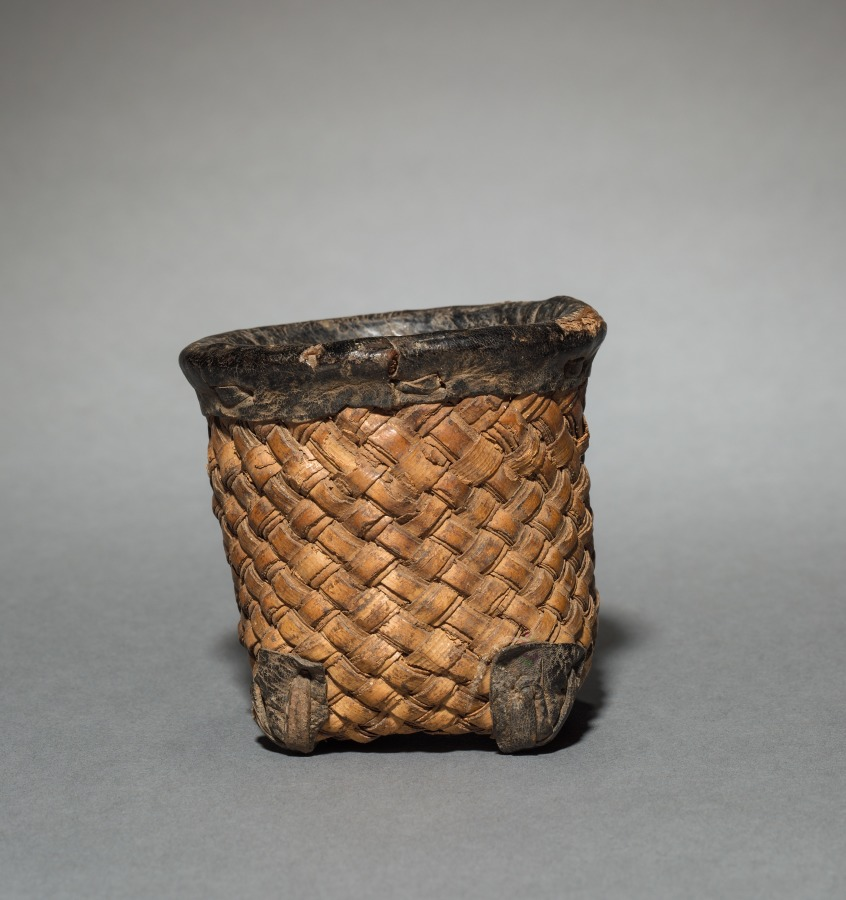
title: One of Ten Nesting Wedding Baskets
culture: Africa, Western Africa, Burkina Faso, Lobi–style maker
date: c 1900s?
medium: Plant fiber and leather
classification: Vessels